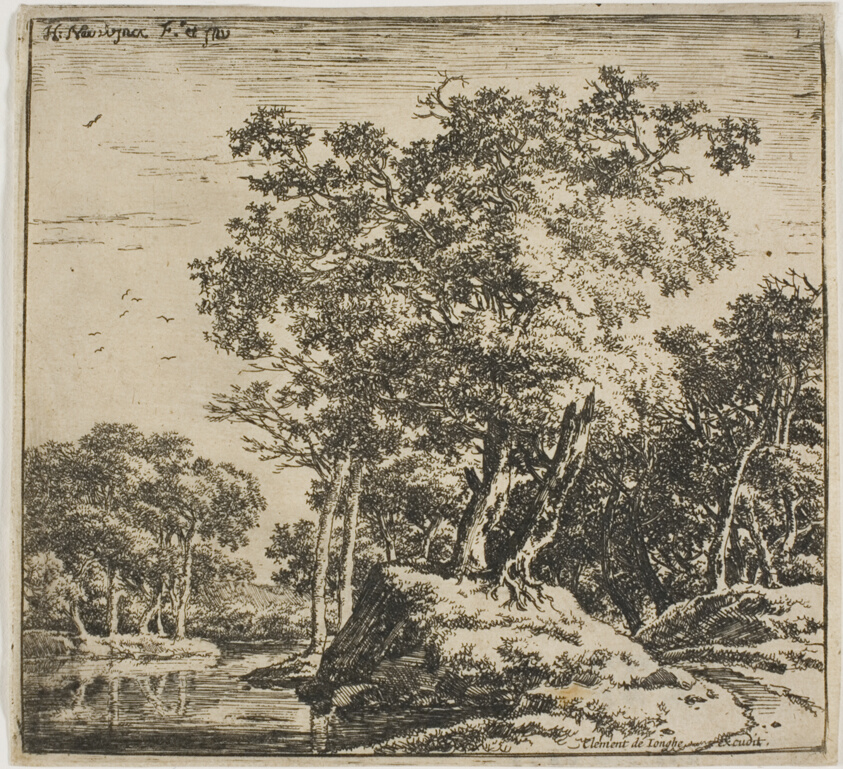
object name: Print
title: Landscape, from Set of Landscapes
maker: Herman Naijwincx (Dutch, 1624-1651)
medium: Etching in black on paper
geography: Netherlands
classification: etching; print; prints and drawing